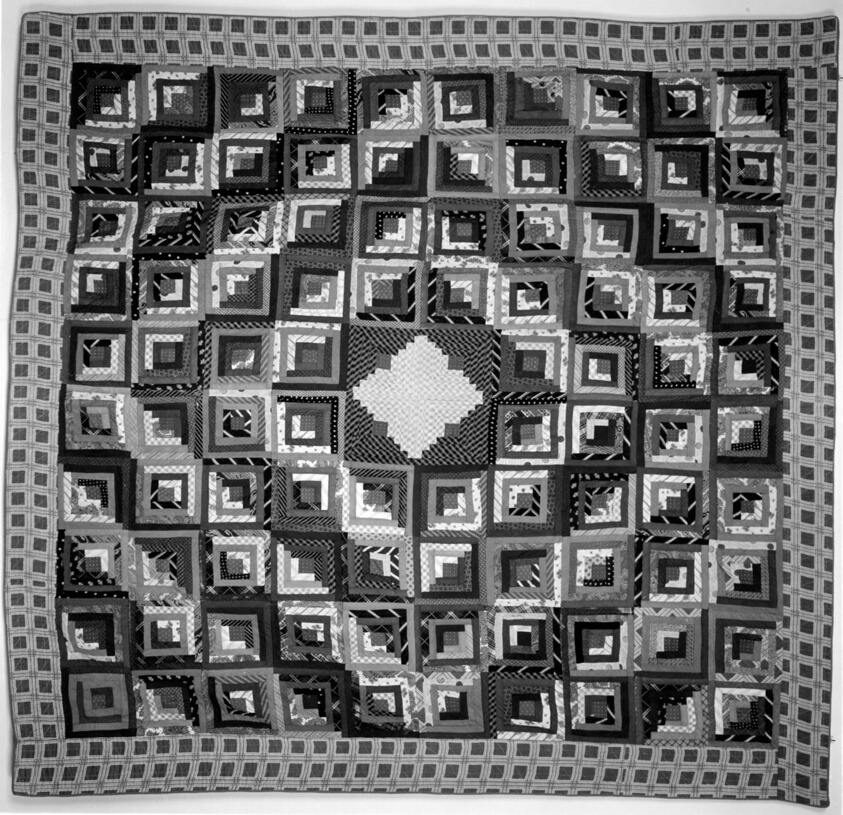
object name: Textile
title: Bedcover (Log Cabin Quilt)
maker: United States, Pennsylvania, Shermans Dale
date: 1825/50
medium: Cotton and wool, in a variety of weaves and printing techniques; made of pieced strips; edged with quilted plaid border; backed with cotton plain weave, small scale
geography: Pennsylvania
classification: textile; needlework - quilt